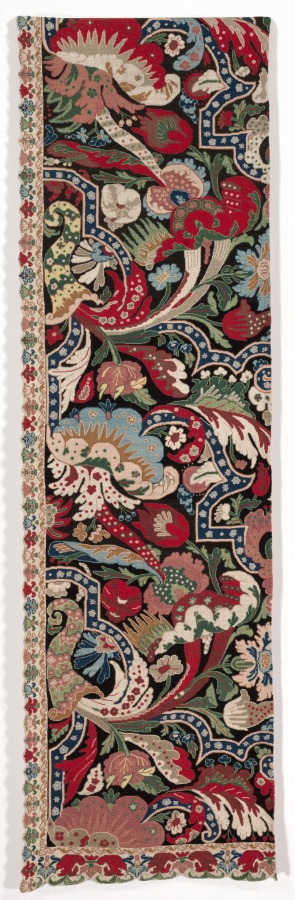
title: Pair of Needlework Bed Hangings in the Bizarre Style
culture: France, 18th century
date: 1710–20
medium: Silk, wool: needlework, tent and cross-stitch embroidery on canvas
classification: Embroidery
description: These panels would have hung originally around a bed post as part of a full set of hangings on a bedstead in the early 1700's. Elaborate textile hangings were a conspicuous display of wealth since many ladies received their friends within their bedchamber. A full set enveloped the entire bedstead and, when closed, helped retain warmth long after the fire had gone out. This particular pair of panels is remarkable in that they represent many hours of highly skilled needlework. Their design is known as a "bizarre" pattern, which mimicked woven silks of the same era that were asymmetrical, boldly stylized adaptations of Asian fabrics that were coming into the European market from the trading routes at the time.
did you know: The design of this pair of needlework panels is known as a "bizarre" pattern.